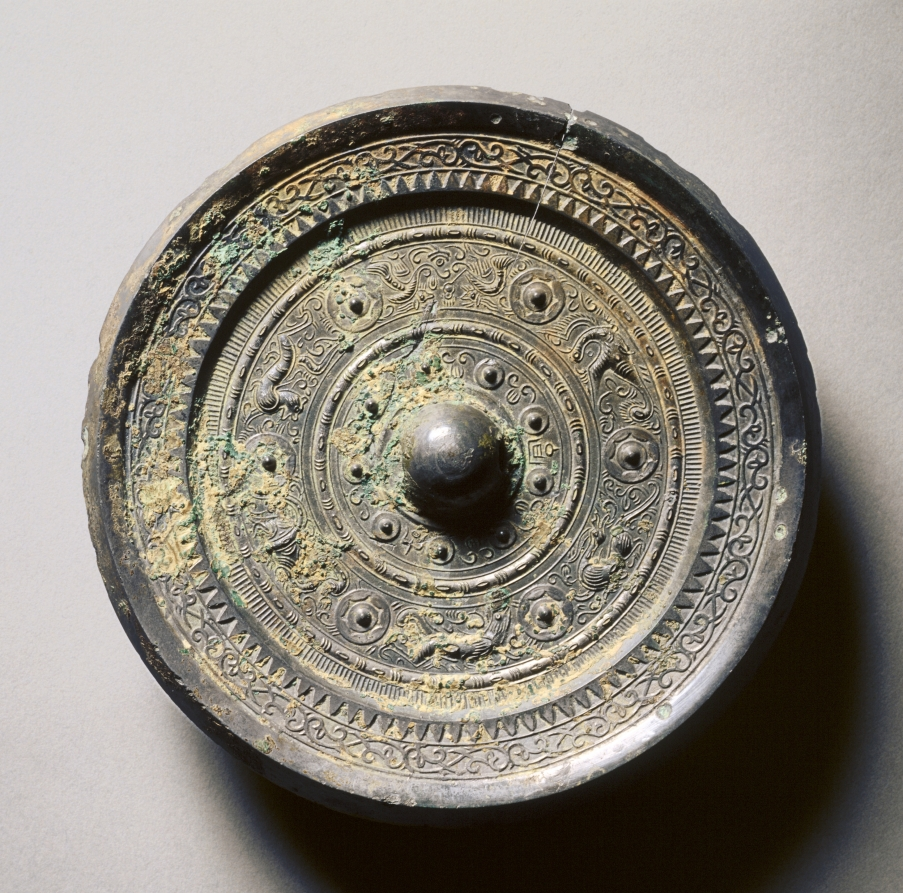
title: Mirror with Concentric Circles, an Immortal, and Auspicious Animals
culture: China, Eastern Han dynasty (25–220 CE)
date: 25–100 CE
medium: bronze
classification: Metalwork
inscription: May your sons [and grandsons] cherish it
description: Mirror with Concentric Circles, an Immortal, and Auspicious Animals, 1st century ad China, Eastern Han dynasty (ad 25-220) CMA 1995.304 [Cat. no. 23]